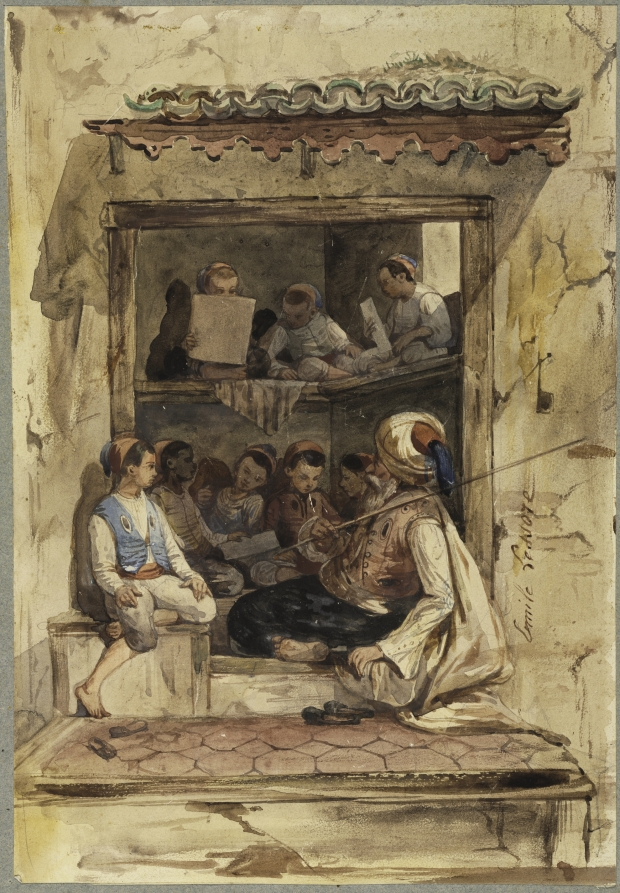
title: Boy's School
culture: France, 19th century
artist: Emile Aubert Lessoire (French, 1805–1876)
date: 19th Century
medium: watercolor with gouache over graphite, with traces of gold paint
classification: Drawing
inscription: signed, center right, in brown watercolor: Emile Lessore [sideways]